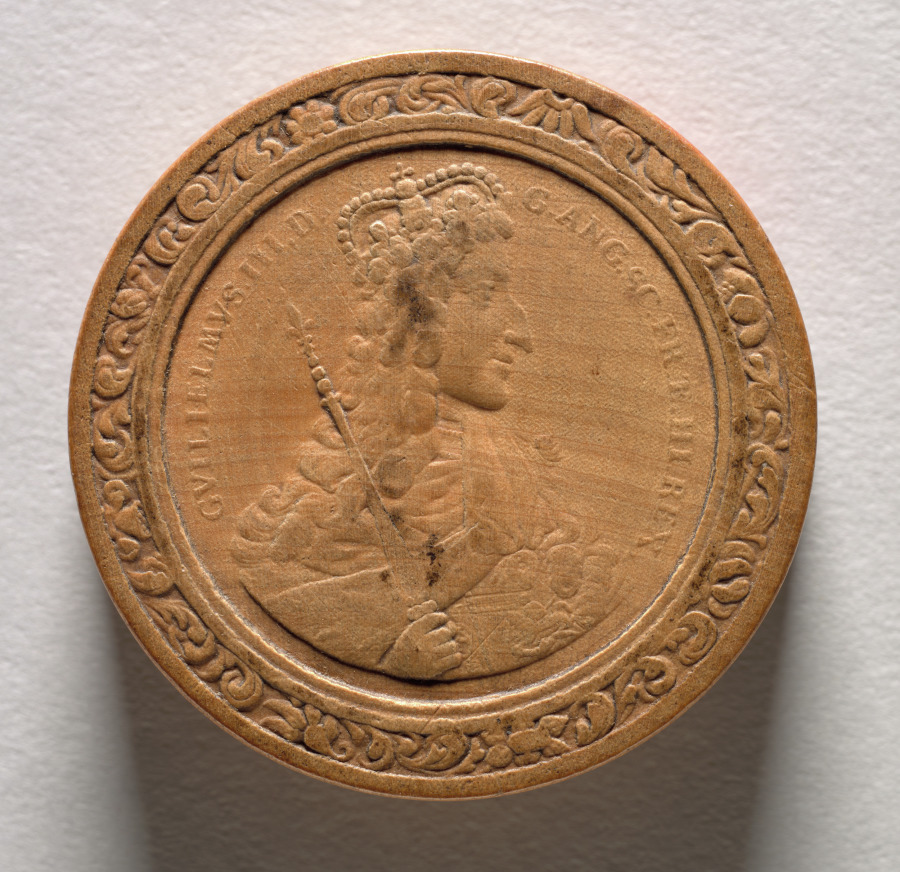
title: Gaming Piece (obverse)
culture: Germany, late 17th-early 18th Century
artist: Martin Brunner (German, 1659–1725)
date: c.1700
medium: wood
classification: Furniture and woodwork